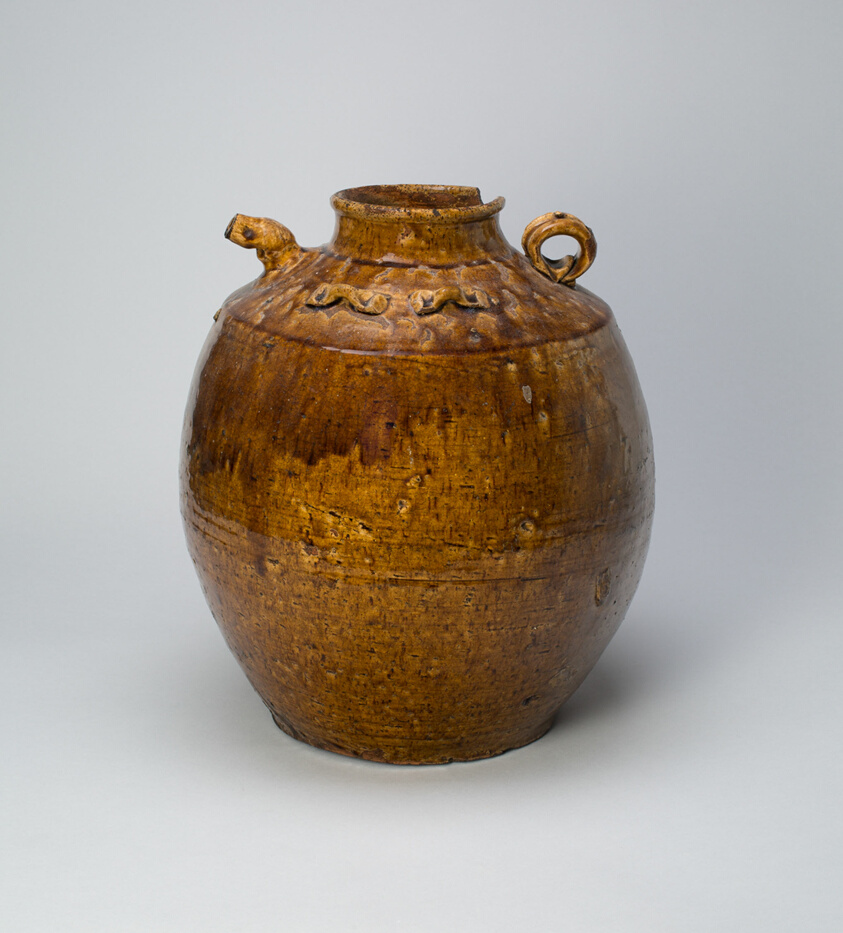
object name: Vessel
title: Jar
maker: China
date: Late Ming dynasty (1368–1644), c. 17th century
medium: Stoneware with brown glaze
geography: China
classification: stoneware; asian art; ceramics; vessel